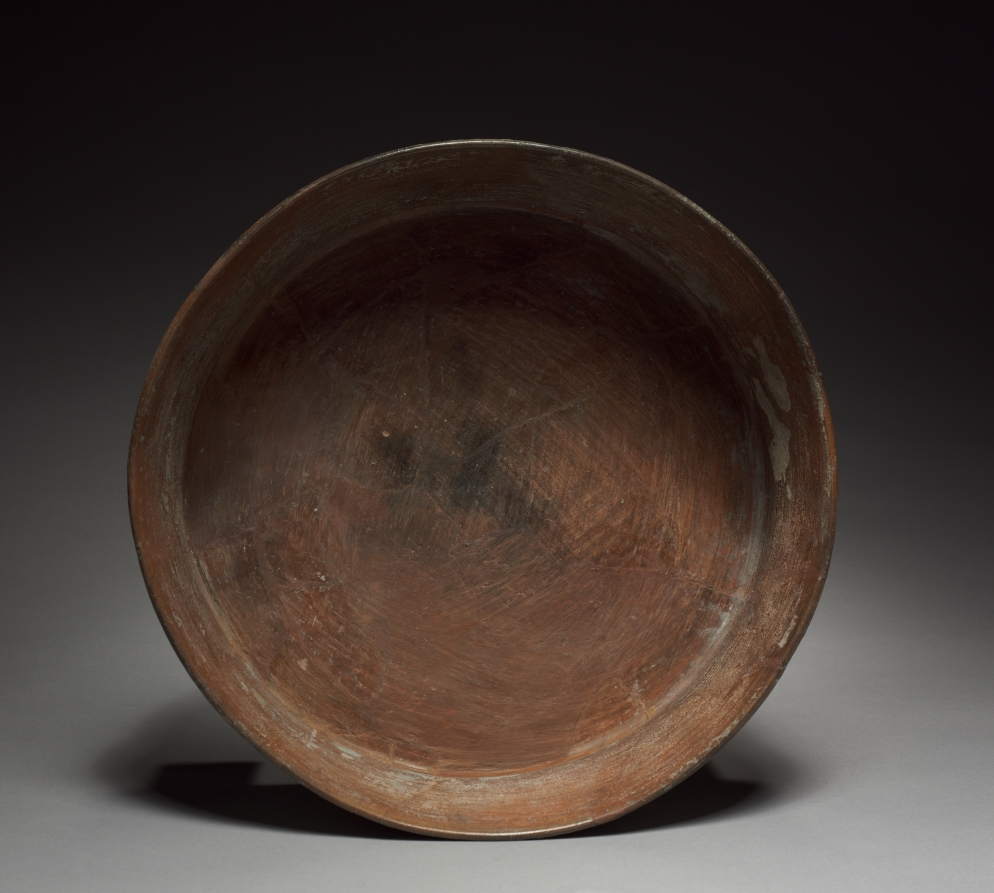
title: Basin with Feathered Serpent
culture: Central Mexico, Teotihuacán style, Classic period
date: 400–550 CE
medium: earthenware, stucco, pigment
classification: Ceramic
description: The serpent covered with the green feathers of the tropical quetzal bird is an image of verdant, bountiful nature and life. It also may be a symbol of rulership, thus linking rulers to cosmic forces and the natural order. Four human hearts lie beneath the serpent on this unusually large basin, suggesting that sacrifice stimulates nature’s fruitfulness.